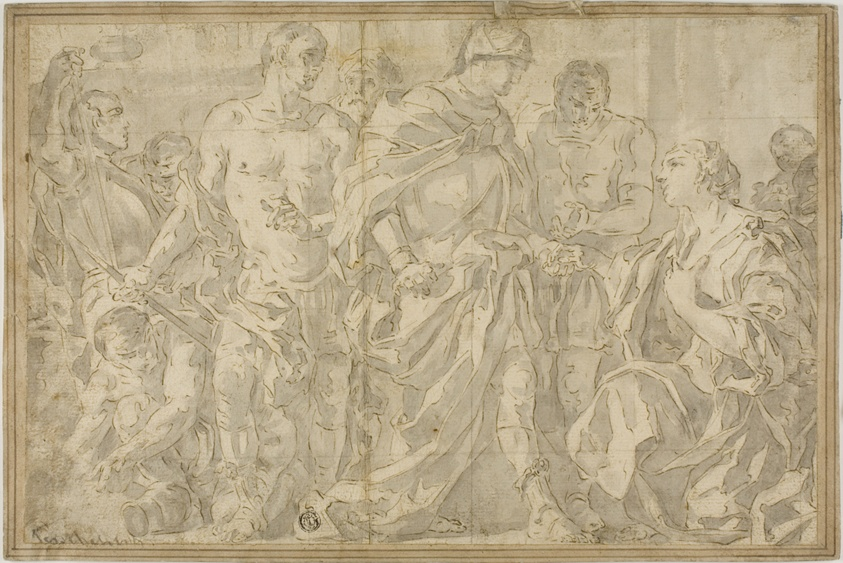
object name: Drawing and Watercolor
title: Abigail before David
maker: Circle of Francesco Solimena (Italian, 1657-1747); or Mattia Preti (Italian, 1613-1699); or the style of Francesco Solimena (Italian, 1657-1747)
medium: Pen and brown ink, with brush and gray wash, over traces of black chalk, on cream laid paper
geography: Italy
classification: ink or chalk wash; drawings (visual works); prints and drawing